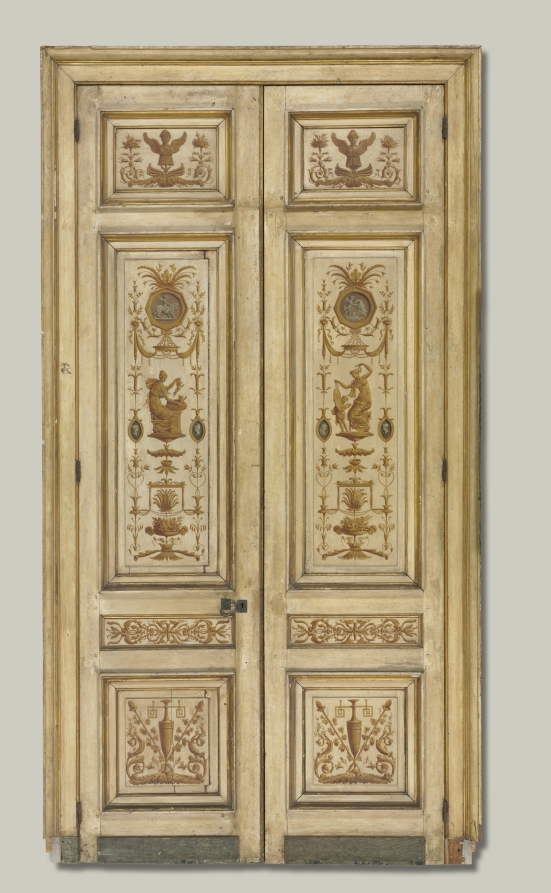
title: Double-Leaf Doors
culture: France, 18th century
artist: Pierre Rousseau (French, 1751–1829)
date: 1790s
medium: oil on wood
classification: Painting